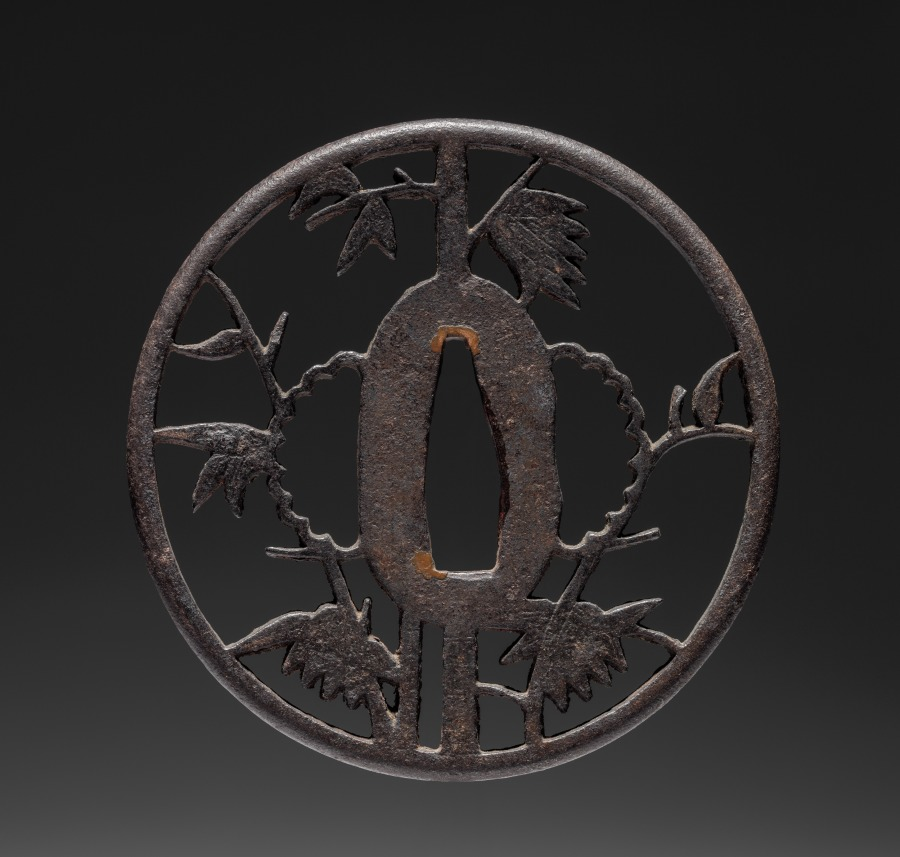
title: Sword Guard (Tsuba) with Bamboo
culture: Japan, Edo period (1615–1868)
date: c. 1615–1868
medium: iron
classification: Arms and Armor